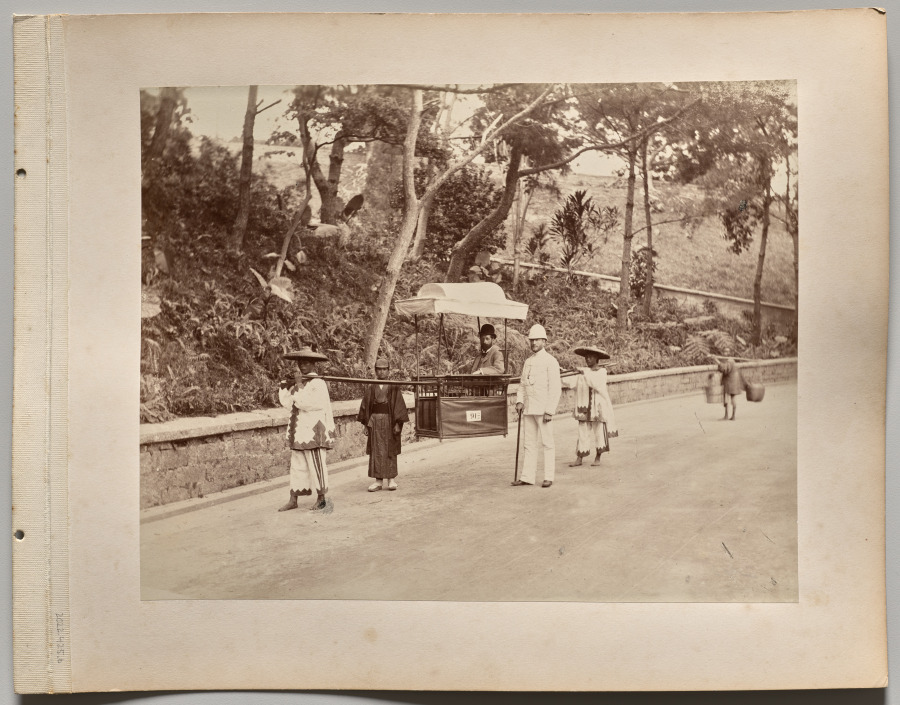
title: Untitled (man being carried in sedan chair, verso)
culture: England, 19th century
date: c. 1880s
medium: gelatin silver print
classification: Photograph